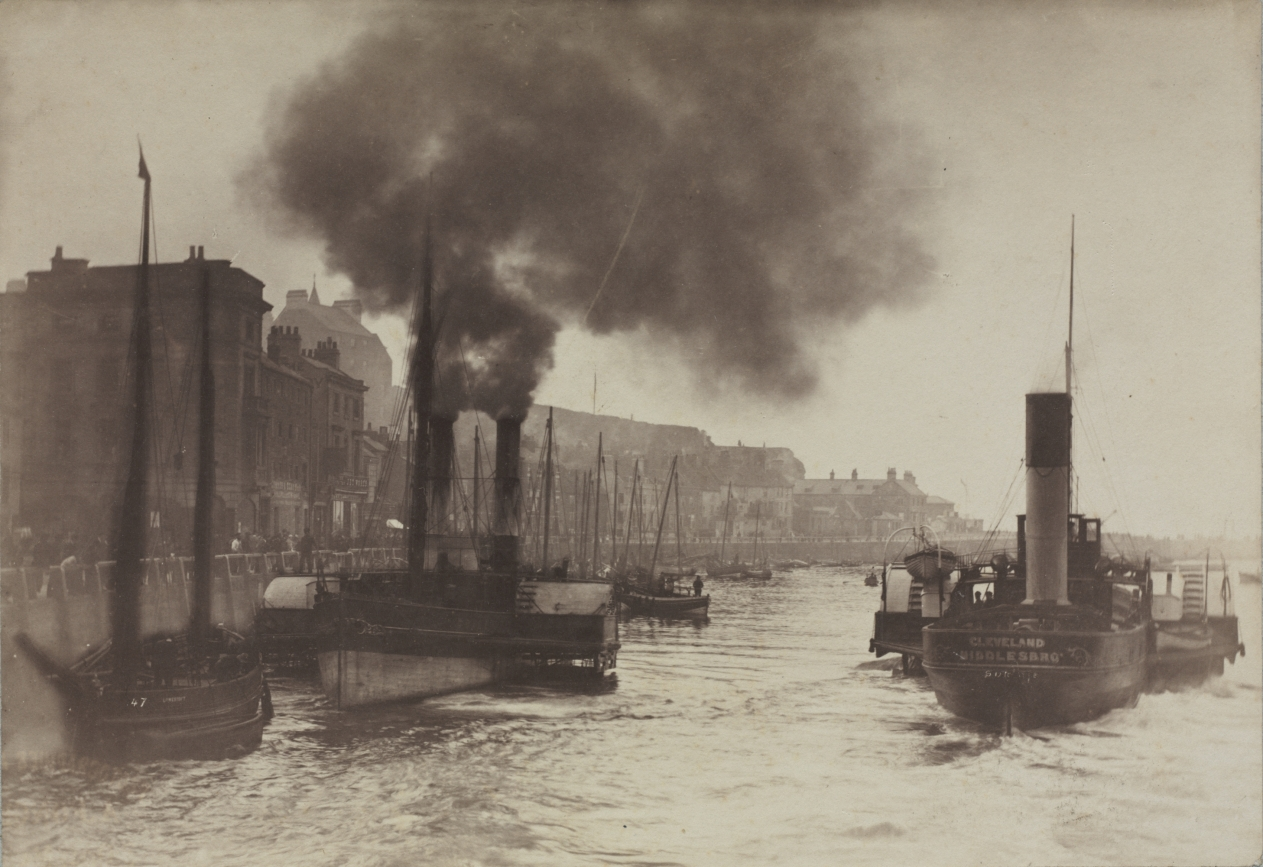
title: Untitled (Harbor Scene)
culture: England, 19th century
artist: Frank Meadow Sutcliffe (British, 1853–1941)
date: c. 1880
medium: albumen print from wet collodion negative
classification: Photograph